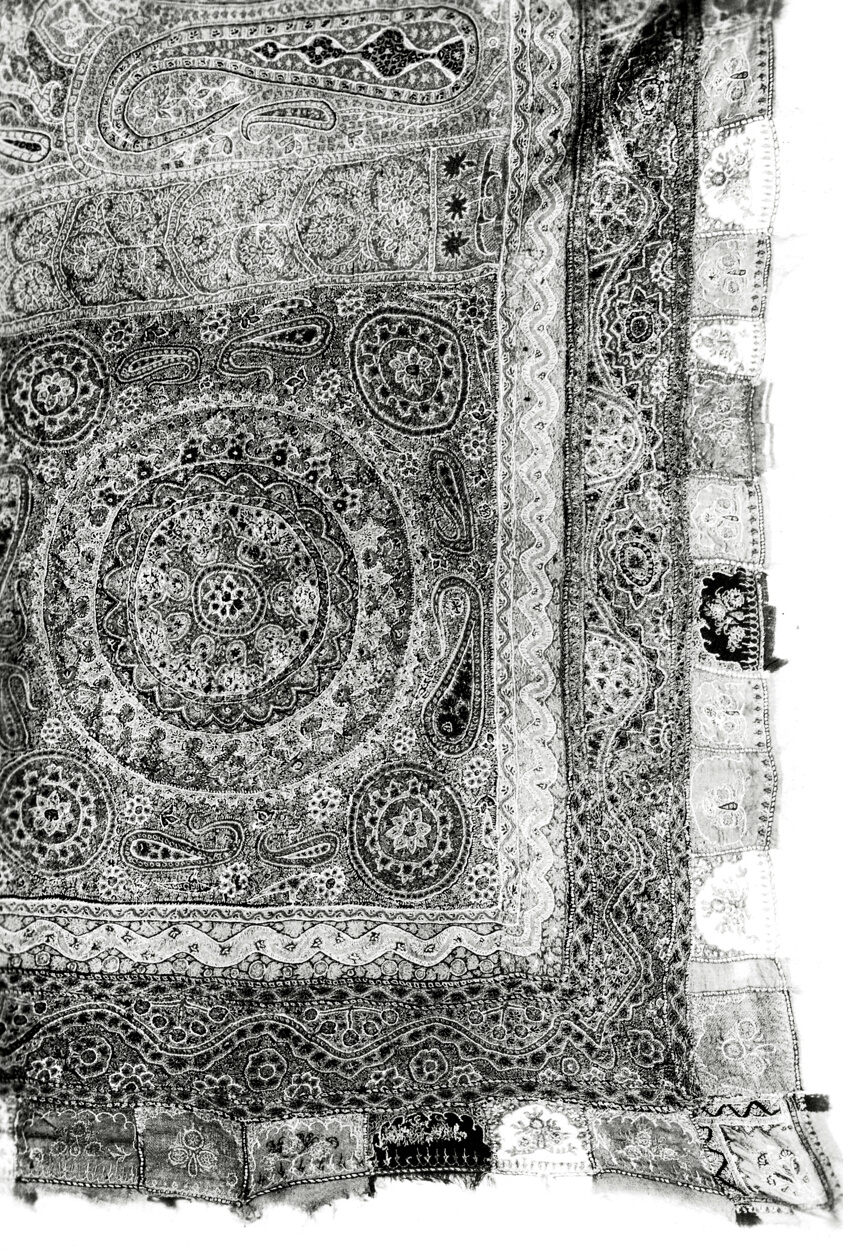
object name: Costume and Accessories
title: Shawl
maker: India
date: 19th century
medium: Cashmere wool composed of many small pieces of embroidered plain simple twill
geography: India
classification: textile; costume; dress (garment); clothing